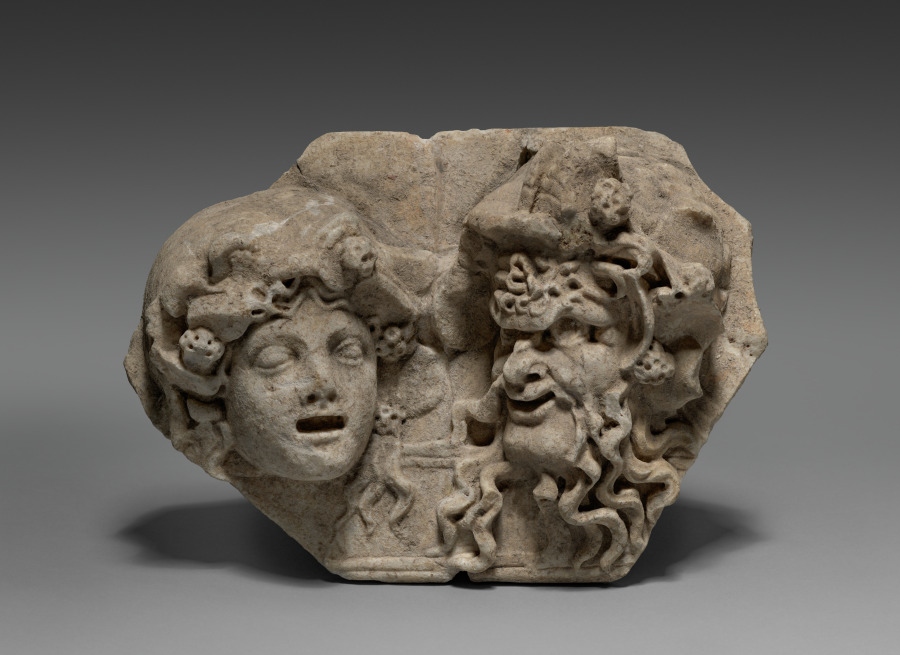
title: Two Masks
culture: Italy, Roman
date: 200s CE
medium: marble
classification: Sculpture